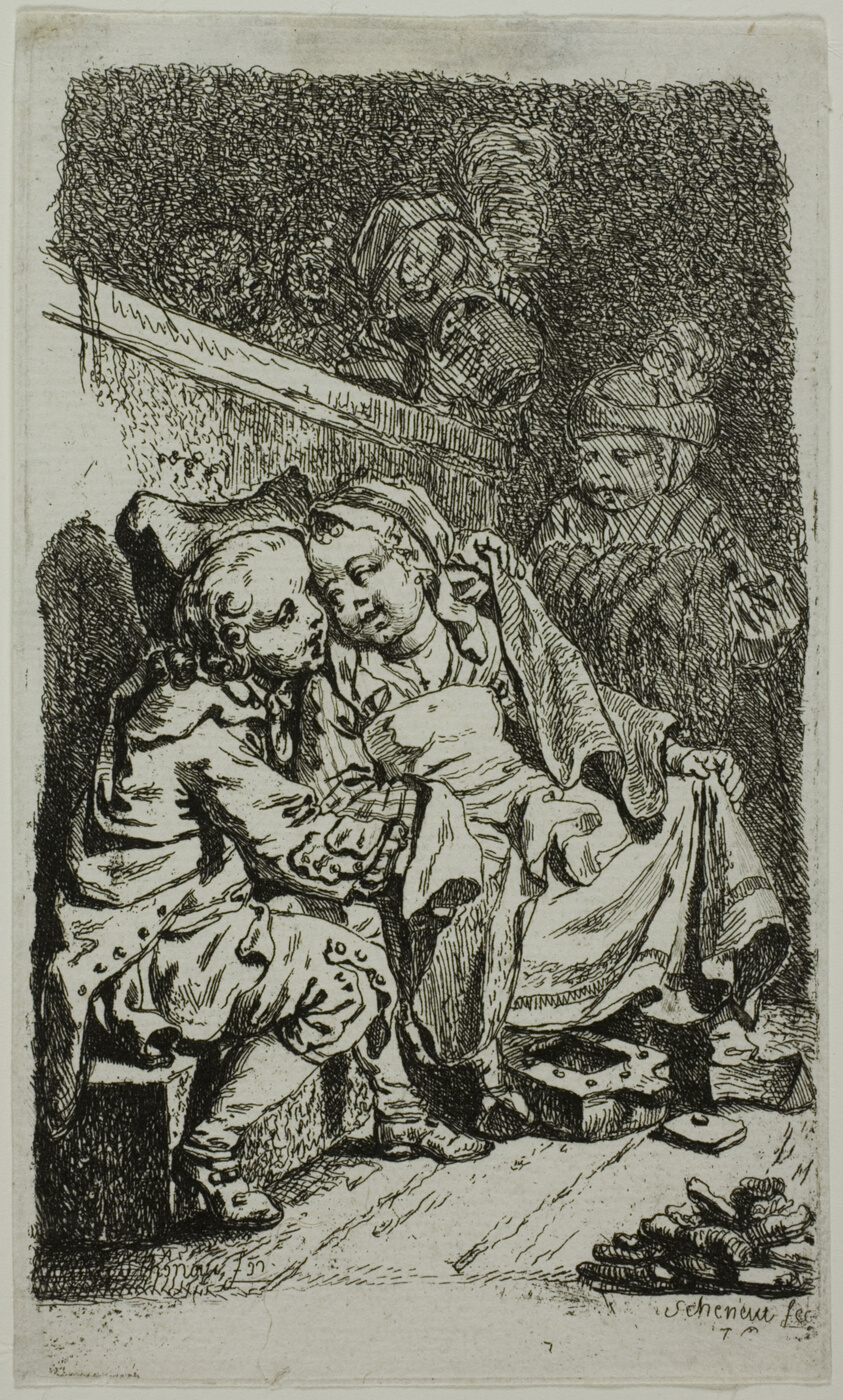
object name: Print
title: Protection Against Cold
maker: Johann Eleazar Schenau (German, 1737-1806)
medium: Etching on cream laid paper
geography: Germany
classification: etching; print; prints and drawing